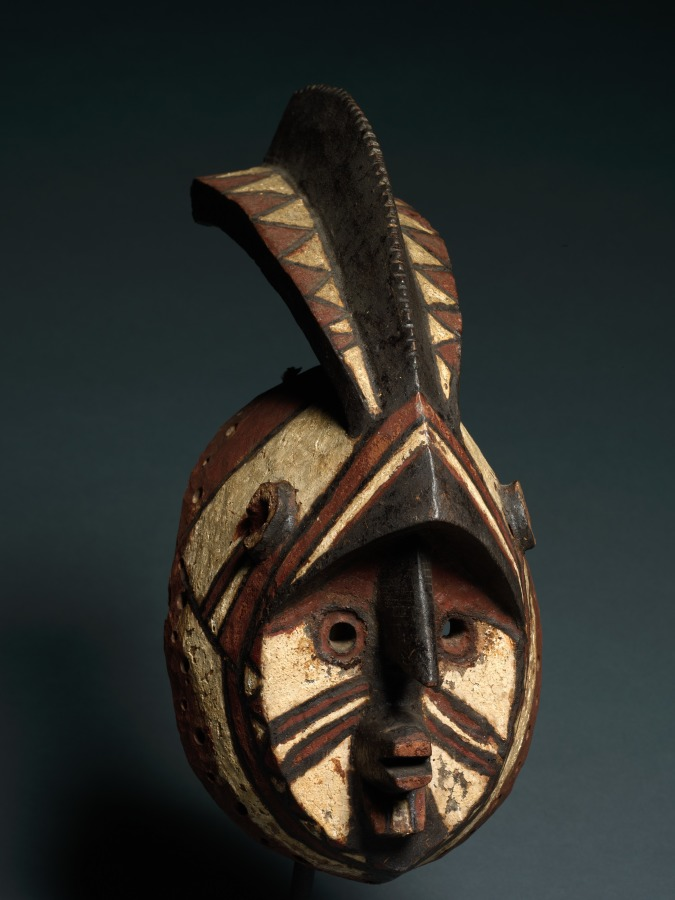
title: Mask (wan-balinga)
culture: Africa, West Africa, Burkina Faso, Mossi-style blacksmith-carver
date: early 1900s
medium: Wood and paint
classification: Mask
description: Only the farmers among the Mossi people employ masks. This mask’s proper name, wan-balinga, evokes a mythical figure who was the mother of the first Mossi ruler. Such masks are most typically worn and danced with on the occasion of the funeral of a male or female elder as escorts of the corpse to the grave. They also appear during annual memorial services that occur months after the actual burial, when all the deceased clan members are commemorated and honored.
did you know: This mask was worn and danced upon the death of an elder, escorting the corpse to the grave.